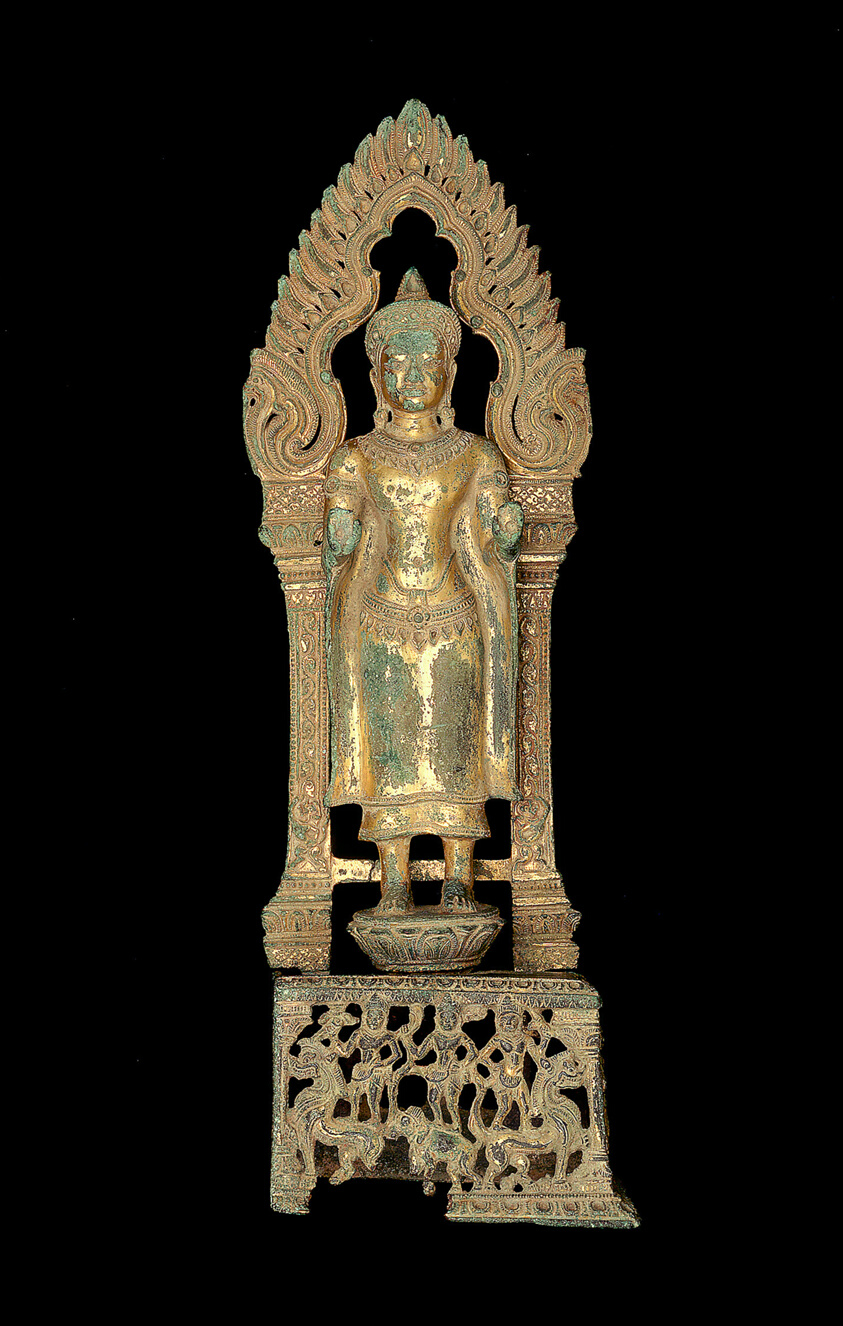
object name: Sculpture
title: Altarpiece with Adorned Buddha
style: Southeast Asian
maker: Thailand; Northeastern Thailand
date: Angkor period, 13th century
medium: Gilt bronze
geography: Thailand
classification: bronze; metal; sculpture; asian art